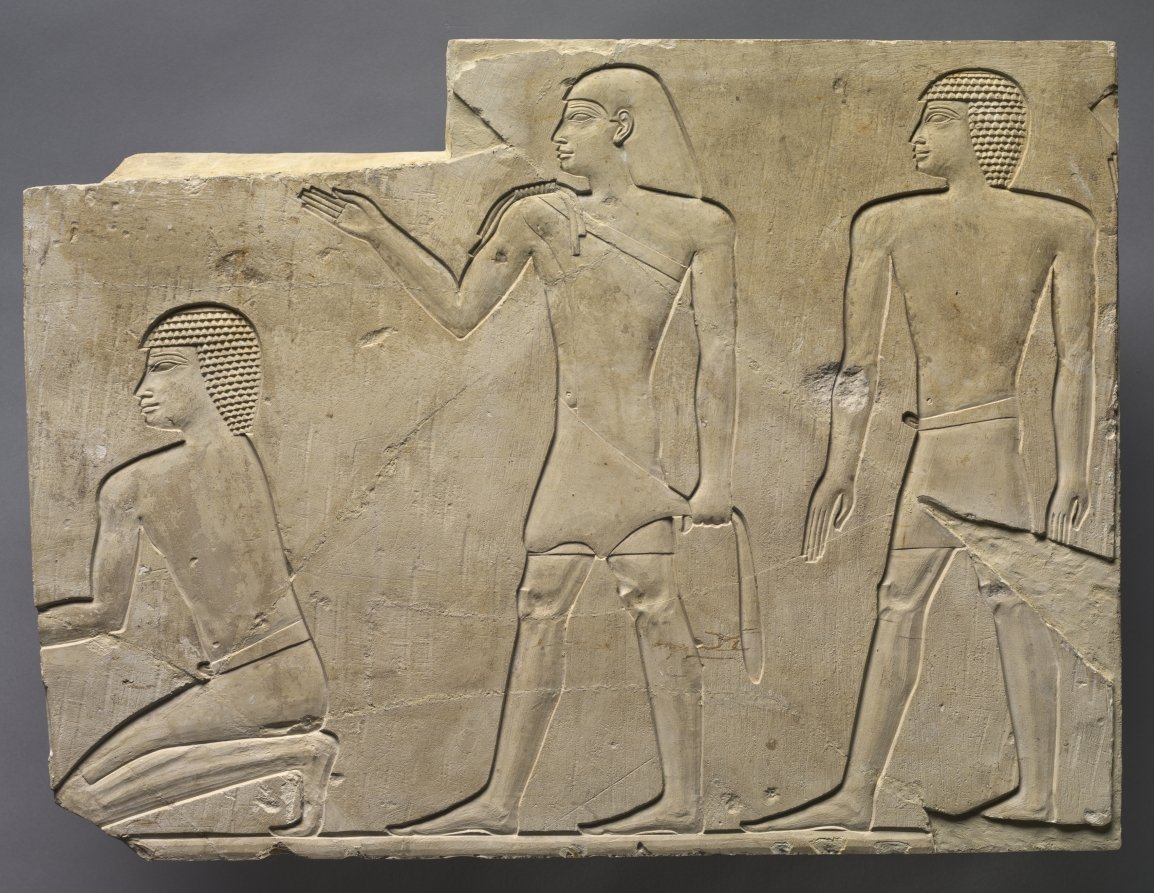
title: Priests Performing Funeral Rites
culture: Egypt, Late period (715–332 BCE), Dynasties 25–26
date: c. 667–647 BCE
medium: limestone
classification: Sculpture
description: A priest and two attendants perform ceremonies for the deceased. Originally, there probably existed (to the left) certain offerings. It is an exact copy of a scene in the Temple of Deir el Bahari made some seven centuries earlier where the figures are reversed.